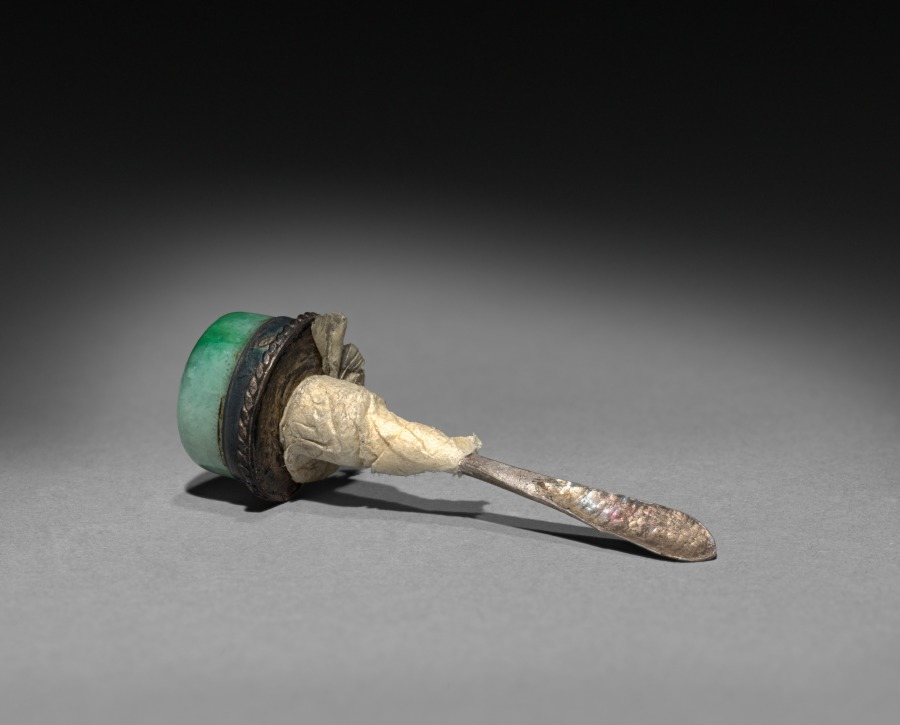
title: Snuff Bottle (stopper)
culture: China, Qing dynasty (1644-1911)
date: 1644–1911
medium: glass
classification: Glass